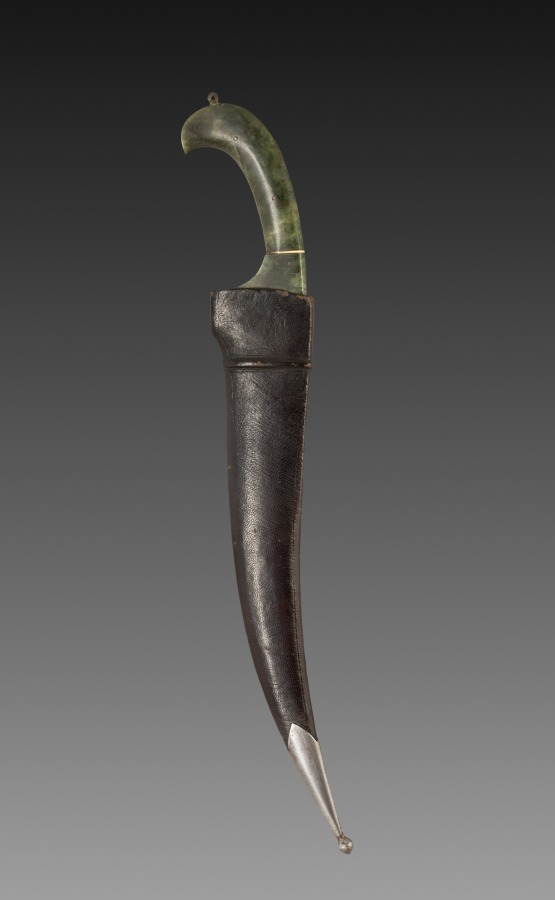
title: Dagger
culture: India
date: 1800s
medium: iron with bone and silver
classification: Arms and Armor